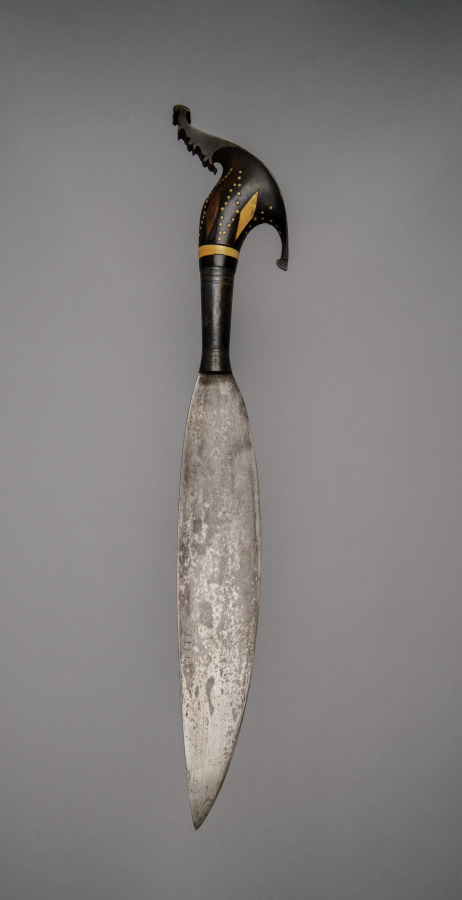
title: Sword (Barong)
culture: Philippines, Mindanao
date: before 1918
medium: Blade: metal; grip: silver; handle: wood with ivory inlay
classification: Arms and Armor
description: This sword has a broad, leaf-shaped blade characteristic of the Sulu Archipelago. Its profile suggests it was used for powerful cut-and-slash fighting. The hilt, carved from kamagong hardwood, terminates in an elongated ivory cockatoo (kakatua) pommel. Decorative ivory inlay is embedded into the kamagong surface, forming geometric and dotted patterns that follow the natural curves of the hilt.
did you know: This object’s ivory inlay is unusual—bone or mother of pearl were more common.